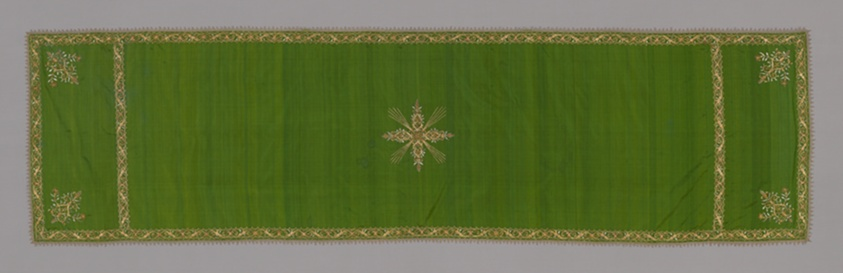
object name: Religious/Ritual Object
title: Altar Cover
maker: Italy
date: 17th century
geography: Italy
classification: textile; needlework (visual works); liturgical; altar; ritual objects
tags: altar